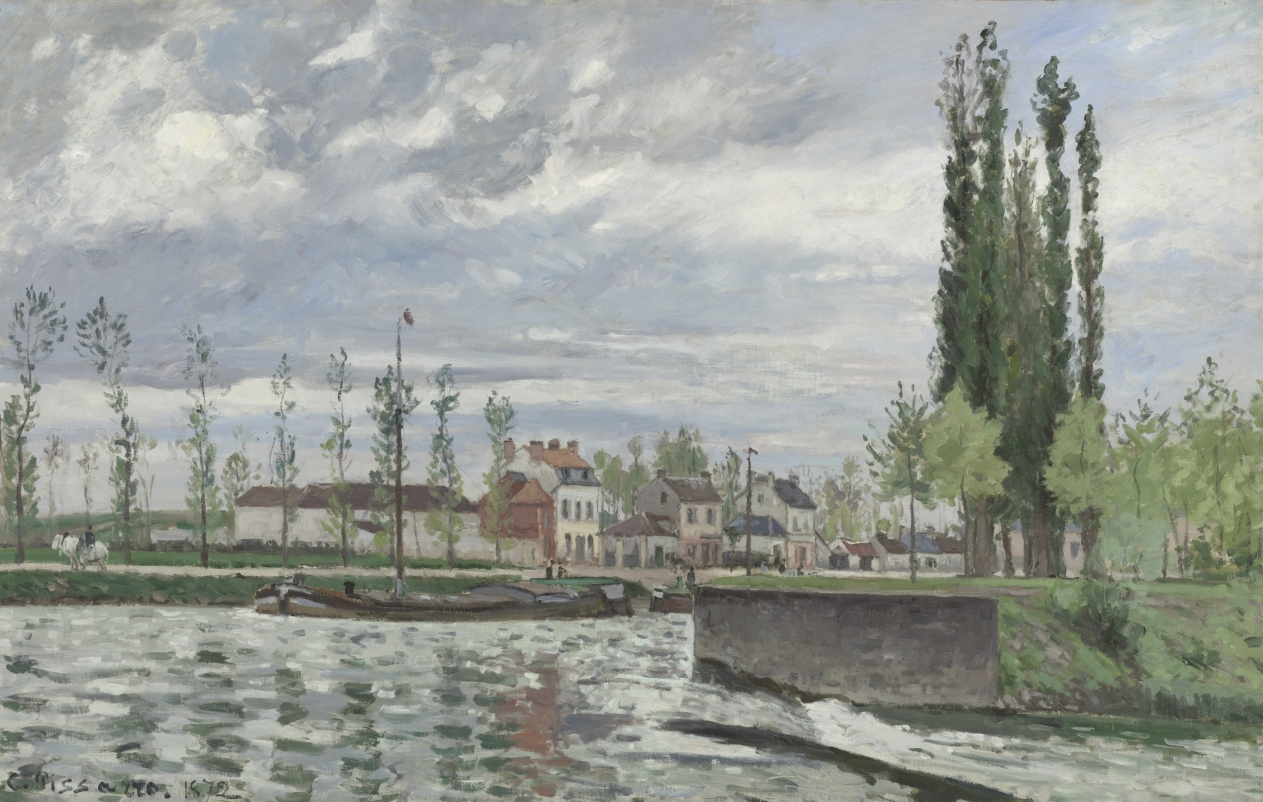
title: The Lock at Pontoise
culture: France, 19th century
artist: Camille Pissarro (French, 1830–1903)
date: 1872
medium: oil on fabric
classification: Painting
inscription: Signed lower left: C. Pissarro 1872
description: Pissarro was instrumental in developing the radically new Impressionist technique of painting quickly outdoors to capture fleeting effects of light and atmosphere. The rushing water and overcast sky in this view of a river lock near the artist’s home at Pontoise, a rural commune about 17 miles northwest of Paris, are rendered with rapid, broken brushstrokes of pure color. Painting directly on canvas without preliminary drawing, Pissarro may have executed this work in a single session. The shimmering surface of broken color conveys the sensation of natural, outdoor light.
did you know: The river portrayed here is 212 miles (341 km) long.